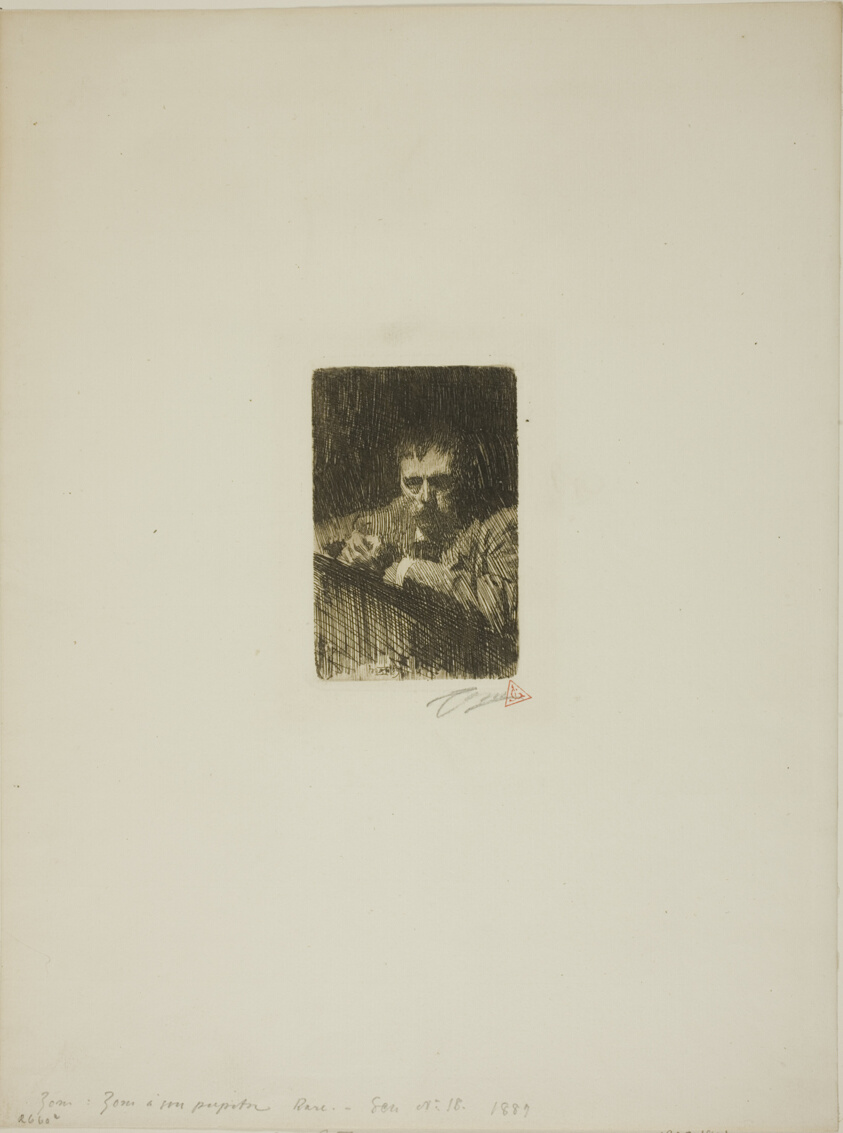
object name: Print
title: A Painter-Etcher (Self-Portrait)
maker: Anders Zorn (Swedish, 1860-1920)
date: 1889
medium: Etching on ivory laid paper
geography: Sweden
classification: etching; print; prints and drawing